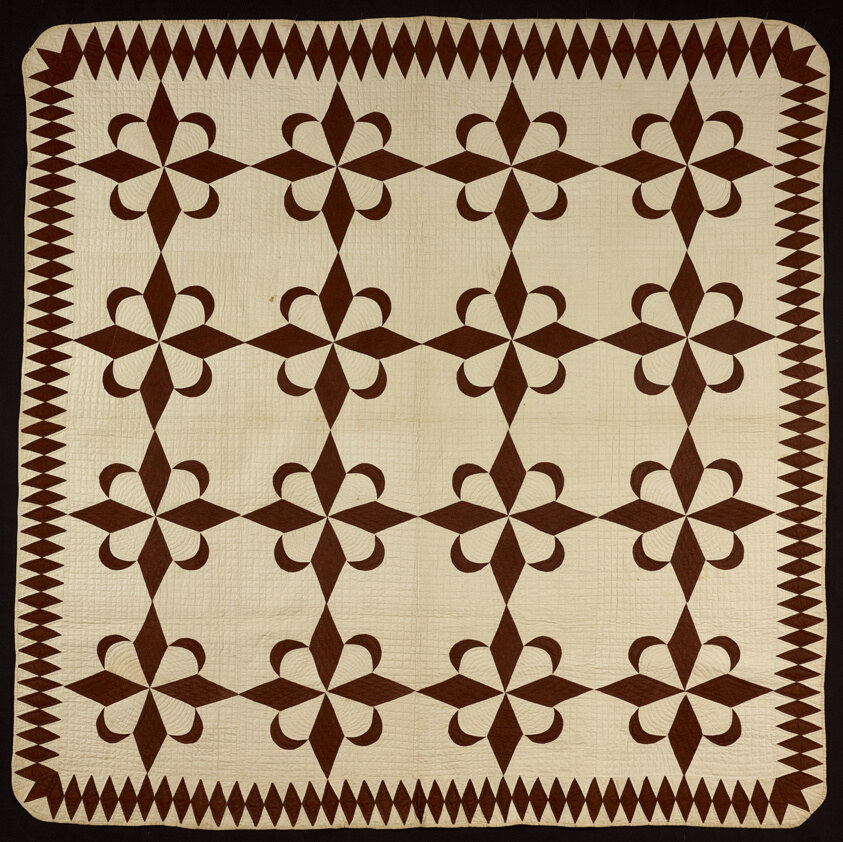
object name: Textile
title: Bedcover ("Star and Crescent" Quilt)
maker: Pennsylvania Dutch; United States, Pennsylvania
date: early 19th century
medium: Cotton, plain weaves; pieced; quilted; backed with cotton, plain weave; printed; edged with cotton plain weave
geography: United States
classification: needlework - quilt; textile